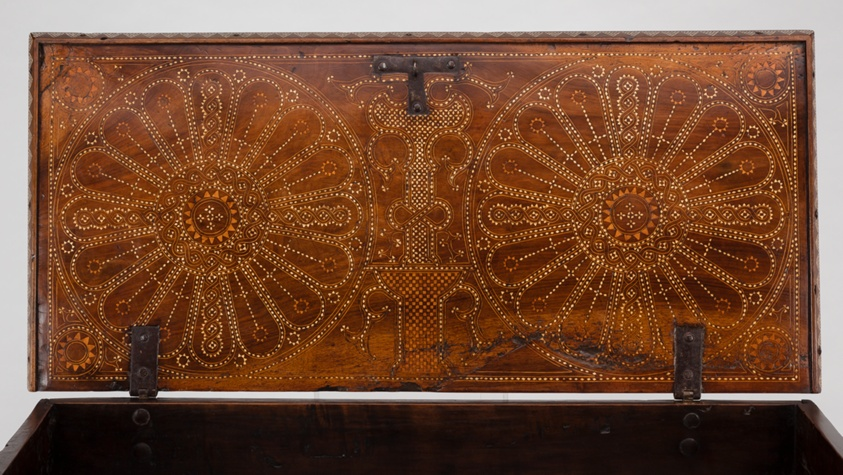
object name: Furniture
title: Writing Cabinet (Escritorio)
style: Islamic, hispano-moresque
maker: Spanish, possibly Granada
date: 1500/50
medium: Walnut, boxwood, bone, iron, copper alloy, and gilding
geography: Granada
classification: furniture; islamic; decorative arts; furnishings; furnishings (transportable); inlay; writing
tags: geometric